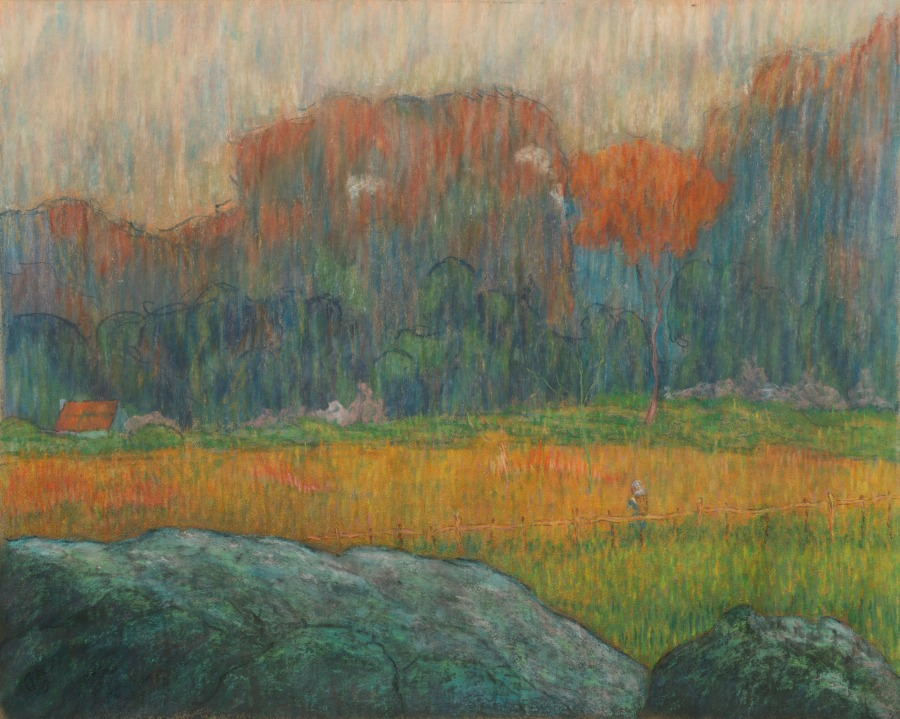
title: Landscape with Figure and Houses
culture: France, 19th century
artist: Claude-Emile Schuffenecker (French, 1851–1934)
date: c. 1891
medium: pastel on brown wove paper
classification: Drawing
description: To record rural landscapes, Emile Schuffenecker often took advantage of recently constructed train lines that facilitated travel outside Paris. Here, he portrayed Meudon, a southwestern suburb. Schuffenecker used easily portable pastel sticks to sketch outdoors, producing studies that he later developed into finished works in his studio. With distinctive vertical marks, he combined complementary colors to increase their intensity, choosing textured brown paper to further this impact. The shimmering result is grounded by massive lichen-covered rocks in the foreground that evoke ancient monumental stones in the area and give the drawing a sense of timelessness.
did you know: On the back of this drawing, Emile Schuffenecker noted "Nocturne Espagnol / flute," referencing a specific piece of music that provided inspiration for the work.